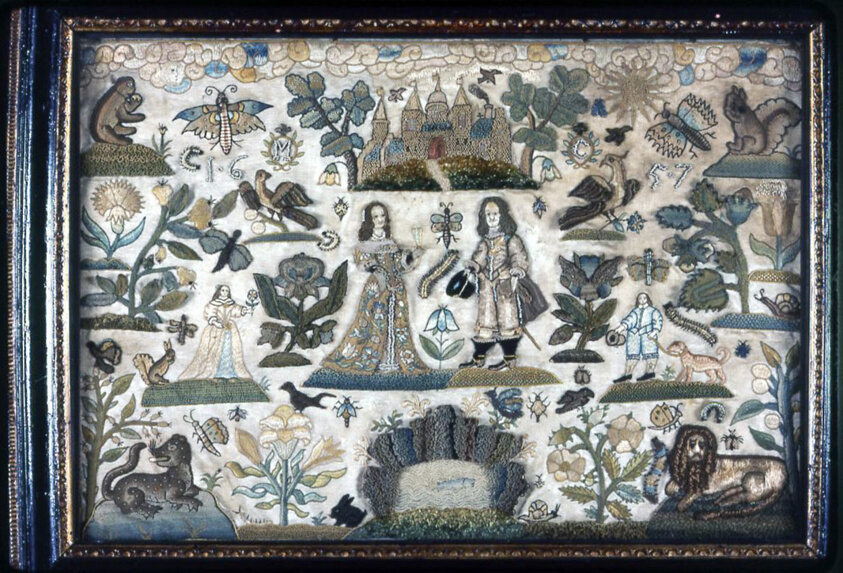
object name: Textile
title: Picture (Needlework)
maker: England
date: 1657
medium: Silk, satin weave; appliquéd with linen, plain weave; embroidered with silk in tent stitches; and with silk, satin weave and linen, plain weave; and silk, silk chenille, silk bouclé, silk-wrapped-metal coils, and linen in back, coral, eyelet, overcast, Roman, satin, single satin, single running, stem, raised stem, split and a variety of buttonhole stitches; laid work, couching, padded couching, French knots and bullion picots; mica, glass beads and seed pearls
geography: England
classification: textile; needlework (visual works)